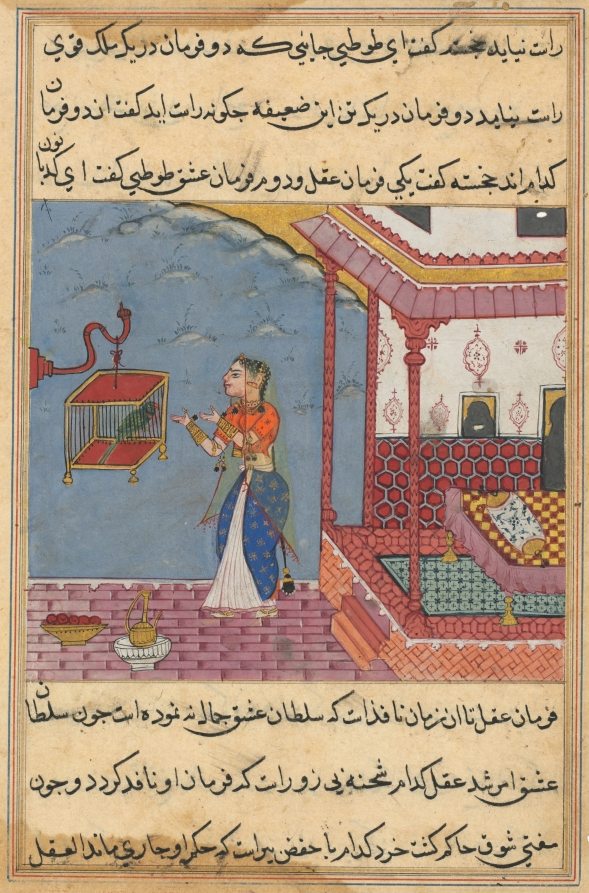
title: The Parrot Addresses Khujasta at the Beginning of the Twenty-Fourth Night, from a Tuti-nama (Tales of a Parrot)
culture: Mughal India, court of Akbar (reigned 1556–1605)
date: c. 1560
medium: gum tempera, ink, and gold on paper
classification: Painting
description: Before Khujasta can sneak away to meet her secret lover, her husband’s talking parrot, Tuti, begins to tell her a tale about a man named Bahir and his lover Habbaza. Like all Tuti’s stories, this is accompanied by a moral message and intended to keep Khujasta from leaving for the night.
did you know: The gold sky and blue hill are traits learned from Safavid Persian painting.